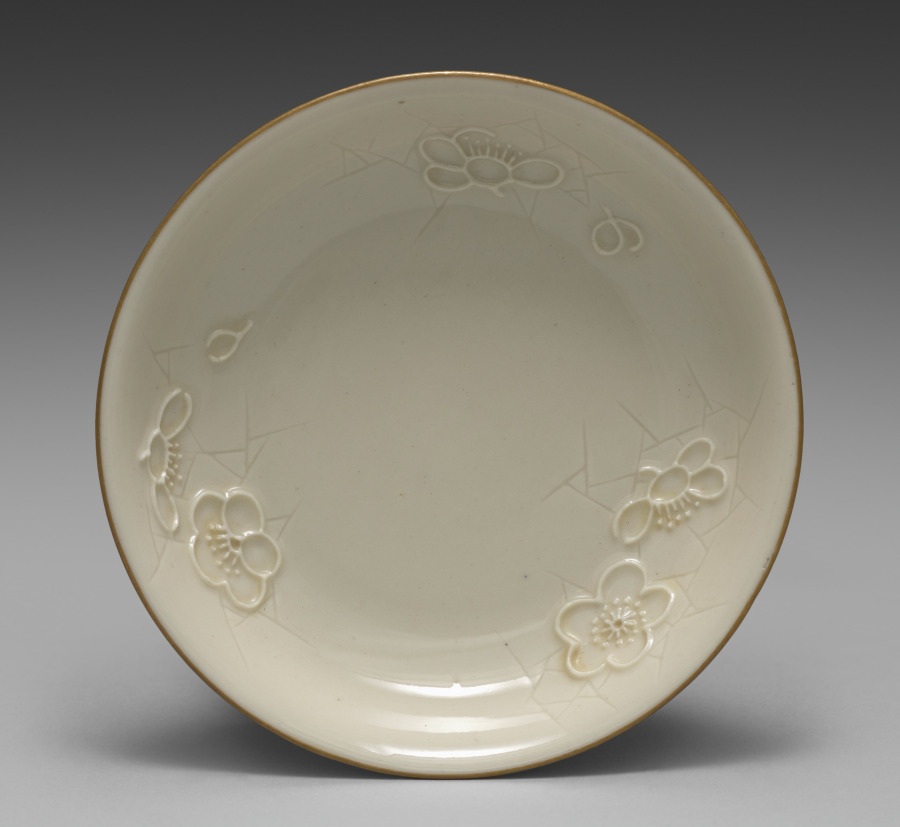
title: Small Dish from Dining Set with Plum Blossoms and Cracked-Ice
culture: Japan, Meiji period (1868–1912)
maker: Seifū Yohei II (Japanese, 1844–1878)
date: c. 1875–78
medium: Porcelain with molded designs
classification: Ceramic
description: Each item in this set has a delicate low-relief design of flowering plum branches over scattered, intersecting lines meant to resemble the cracked-ice surface of a frozen body of water and is signed on the base in gold pigment. While Yohei II produced many fine works in underglaze blue, like those produced by Kiyomizu Shichibei, he also made works in quite different styles later in his career, from the early 1870 s. In 1873, he was appointed purveyor to the Industrial Center of Kyoto Prefecture, a designation associated with Kyoto’s efforts to reach an international market through the port of Kobe; and from 1875 until his death, he was involved in national-level projects to present Japanese ceramics across the world. It was during this period that Yohei III was apprenticed to Yohei II, and it has been suggested that this set may in fact be an early example of Yohei III’s work, which he signed with his teacher’s name. Decorated with flowers resembling Japanese textile motifs, the set calls to mind the design of Yohei II’s pair of vases with plum blossoms in the Victoria and Albert Museum. Here, the elaborate trees created for a formal public exhibition setting have been translated into the approachable blossoms of the genteel domestic environment. While the designs are consistent across the pieces, each raised flower petal and pistil and each incised line in the ice was done by hand, so the cups, bowls, and dishes are similar yet unique. The bottoms of two boxes once identified the set’s owner, but the information has been deliberately obscured with black ink. However, inscriptions still visible appear to indicate two occasions, once at the end of July 1886 , and once again in June 1916 , when parts of the set were requested from Hokura in Niigata Prefecture. The location corresponds to a neighborhood in the present-day city of Jōetsu. The surname Tsuji 辻 also appears on a paper tag affixed to one of the box cloths. Future research may possibly reveal more about their provenance. A vase by Yohei III in a private collection combines the formal grandeur of the Yohei II vases in the Victoria and Albert Museum with the gentler design of this dining set, placing flowering plum trees against soft, scalloped-edge clouds resembling those in golden screens.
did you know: The dining wares have a creamy white coloration that the four boxes containing them identify as Korean in style.